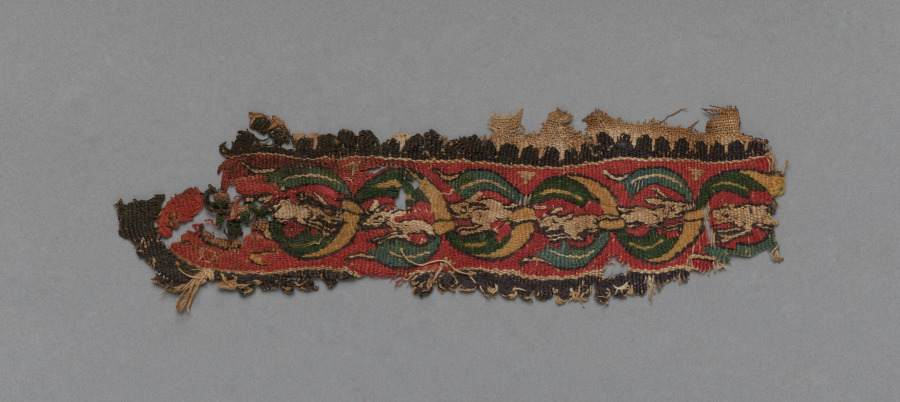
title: Fragment from a Tunic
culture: Egypt, 6th - 16th century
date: 500s - 1500s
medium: tabby weave with inwoven tapestry ornament, linen and wool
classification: Textile